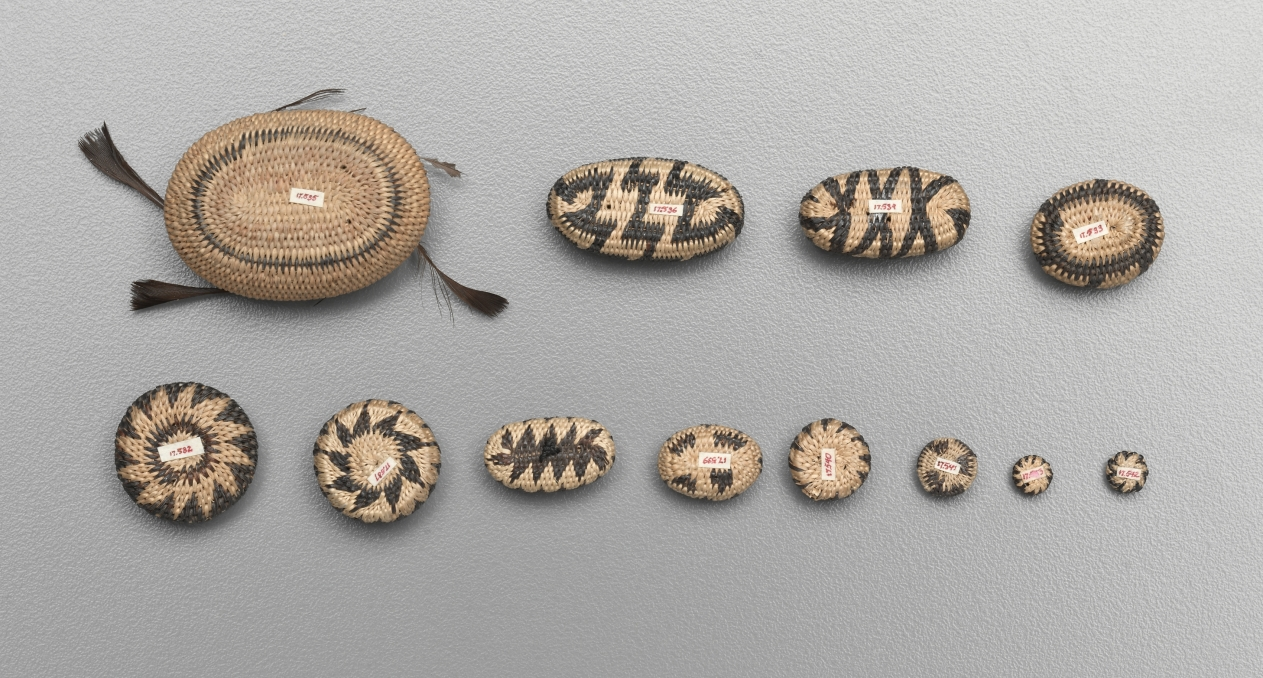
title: Miniature Round Basket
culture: California, Pomo, late 19th-early 20th century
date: late 1800s-early 1900s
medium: plant materials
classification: Basketry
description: Miniature baskets were made to demonstrate the basket-maker’s virtuoso skill, and these tiny marvels seem to be no exception -- the smallest are just a few millimeters wide but still patterned. For such fine work, dexterity was required as much for preparation of materials as for weaving.